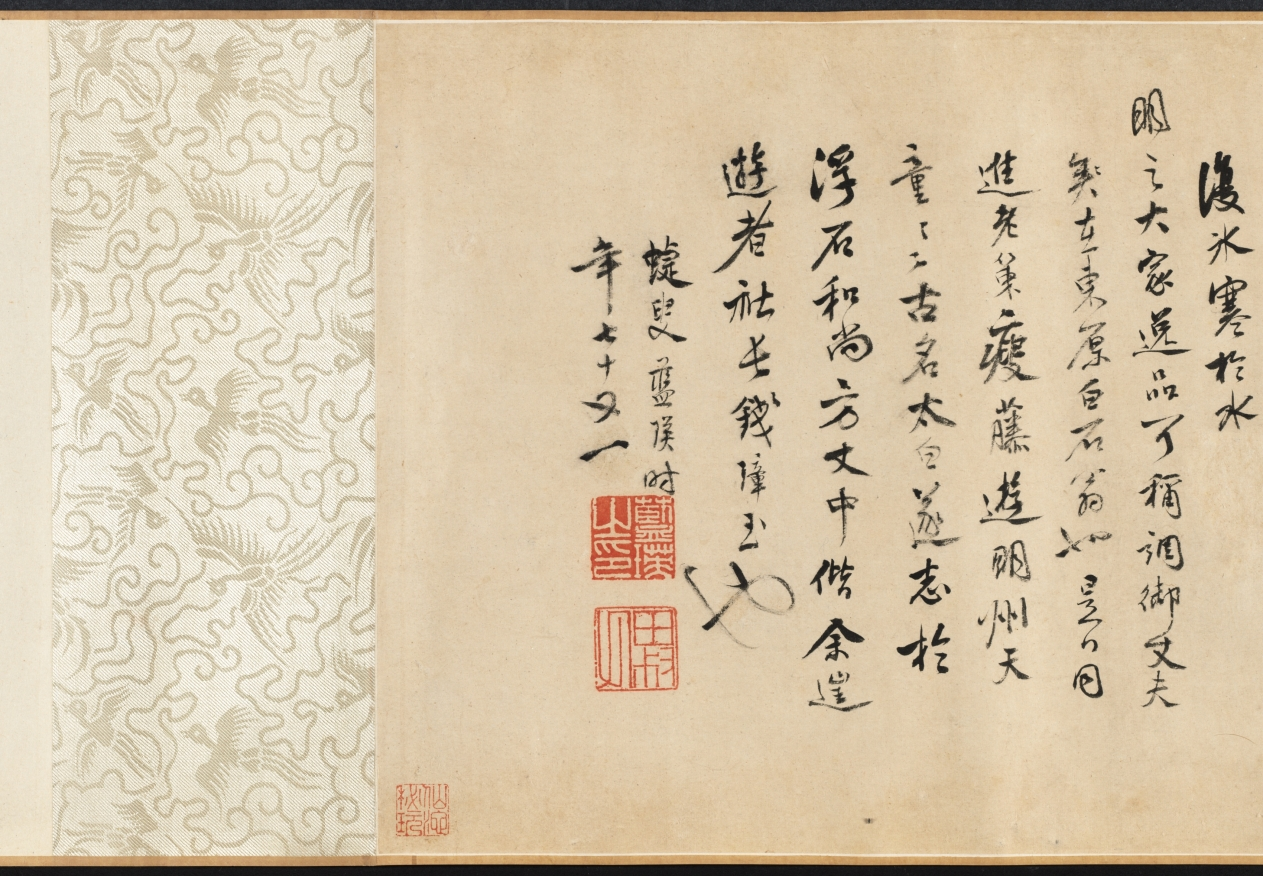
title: Mt. Taibo in the Style of Wang Meng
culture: China, Ming dynasty (1368–1644)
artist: Du Qiong (Chinese, 1396–1474)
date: 1442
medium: handscroll; ink and light color on paper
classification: Painting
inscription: Artist's inscription, signature, and 11 seals: [1 seal] Tung-yüan chai. Huang-ho-shan-ch'iao [Wang Meng] painted a painted called T'ai-po Mountain. Its brushwork is superior and admirable, which is very close to Yu-ch'en [Wang Wei, 699-759]. The cleverness of its composition, the maple groves and rustic temples, the inaccessible ravines and autumnal plateaus, the periolous peaks and strange rocks, etc., all seem to be so natural. The paper is only a little over eight feet, but the landscape has the range of a thousand miles. Once you open and note the contents, it is as if one were roaming among the mountain peaks enveloped in mist and clouds, and forgot the dusty world. When I first saw this, I was so mixed with excitement and joy that I could not take my hands off the painting. So I put it on the table, and tried my best to imitate it, forgetting sleeping and eating for about three months before it was completed. Although I do not dare to tread in the footsteps of Huang-ho shan ch'iao, I took great pains to capture his spirit in composition and colors. I do not know whether it would pass the judgment of the experts. On the fifteenth day of the fifth month, the seventh year of the Cheng-t'ung year [1442], inscribed by Tung-yüan, Tu Chiung. [2 seals] Yung-chia; Ching-chieh ming-men. [8 seals on painting] Tung-yüan chai; Ching-chieh ming-men; Yung-chia; Tu Ch'iung yin; Tung-yüan (repeated 5 times). trans. WKH/LYSL 3 colophons and 7 additional seals: 1 colophon and 2 seals of Chou Ting (1401-1487); 1 colophon and 2 seals of Wu K'uan (1435-1504); 1 colophon, dated 1655, and 2 seals of Lan Ying (1585-after 1664).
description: When a Chinese painter "imitated" a painting by a past master, the intention was never to produce an exact copy. Du Qiong, the Ming painter from Suzhou, is a case in point. The painting style of this handscroll is actually closer to that of Huang Gongwang (1269–1354) than to the style of Wang Meng (about 1301–1385). Both masters were active during the previous dynasty and are among the so-called Four Great Masters of the Yuan dynasty (1279–1368). In this painting, the interplay of styles, including Du Qiong's own, contribute to an inner dimension that is more than visual. Mt. Taibo is located in the province of Zhejiang and is known for its scenic beauty. In this scroll, however, it is not depicted literally. The image is an ideal representation of mountains in southeastern China.